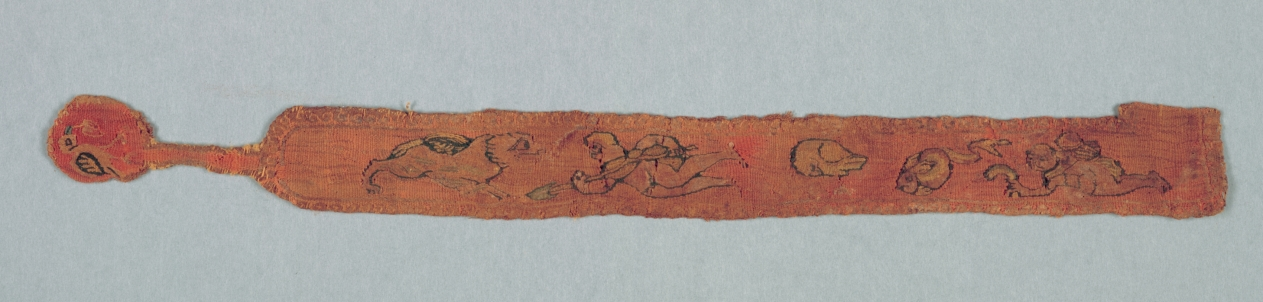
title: Fragment from a Child's Tunic: Clavus I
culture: Egypt, Umayyad period (661–750)?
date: 600s–700s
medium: Wool and linen: tabby weave, inwoven tapestry ornament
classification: Textile